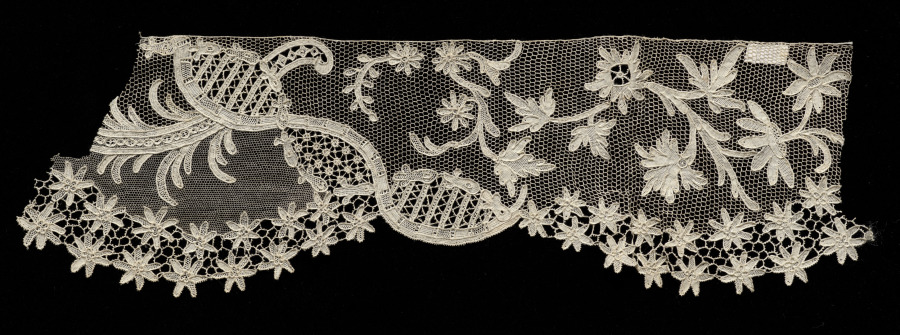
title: Lace Edging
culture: Scuola Merletti di Burano, Italy, Venice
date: c. 1900–1920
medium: Linen: needle lace (Punto Argentan)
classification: Lace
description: This fragment of Venetian Punto Argentan needle lace edging was identified by Luigi Zanini of the Museo del Merletto, Venice, as having been made by the Scuola Merletti di Burano. Photos in an album assembled by the Scuola show that this lace fragment, designed in 1890, exactly matches model no. XXIX in the album. This lace pattern was produced between the end of the 1800s and the first quarter of the 1900s. Although inspired by French point d'Argentan net (champ de bride) and French point d’Alençon net (champ de réseau), this Italian fragment differs from its French counterparts. In this example, the two net fillings imitate but do not copy French needle lace fillings; instead they are a Venetian imitation of French point d’Argentan net filling and Burano net filling. We are able to date our example by looking at the back of the lace under magnification. Very tiny pieces of green paper indicate the lace is from the first quarter of the 20th century, due to the color of the paper (green) on which the lace design was printed.